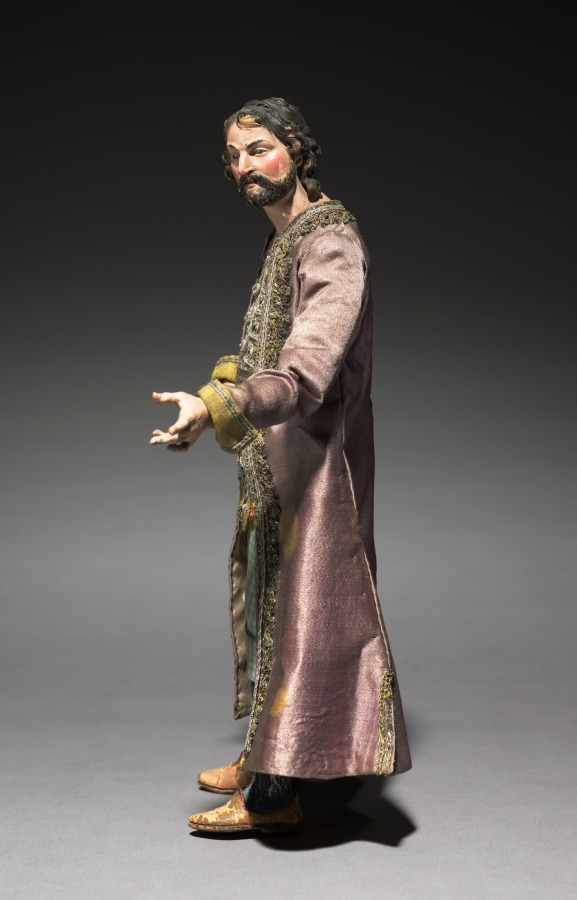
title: Figure from a Crèche: Standing Man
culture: Italy, Naples, late 18th-early 19th century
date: 1780–1830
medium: painted wood and terracotta with various textiles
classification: Sculpture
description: The practice of creating scenes of the Nativity for the home dates from the early 1700s in Italy, where people began to set up doll-like figures of about a foot or less in height. The custom was particularly popular in Naples around 1800, where crèche scenes (crèche means cradle, or crib) included many figures, whose heads and hands of painted terracotta, stuffed cloth bodies, and clothing adapted from contemporary local costumes gave them an amazingly realistic character. Representations of the birth of Jesus can be traced to the first few centuries of Christianity. Both living creatures and sculptural depictions of them were used from early times. By the late middle ages it was customary to create life-size figures of wood or stone, naturalistically painted, to represent the characters who participated in the events of Jesus's early life. These sculptures were then arranged in scenes illustrating one or both of the most important of these events, the Adoration of the Shepherds and the Adoration of the Magi—the three kings from the East who came to pay homage to the Christ child. Used in churches, these large figures were especially popular in Italy, Central Europe, Spain, and Portugal.